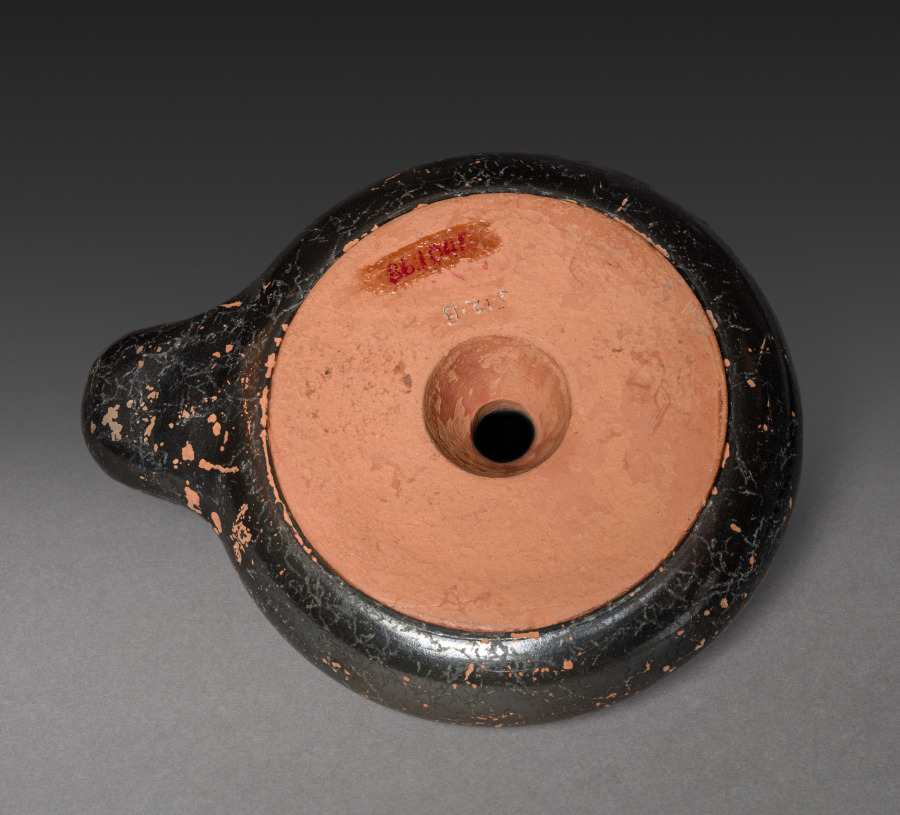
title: Black-Gloss Oil Lamp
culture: Greek, Attic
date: 400s BCE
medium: ceramic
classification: Ceramic